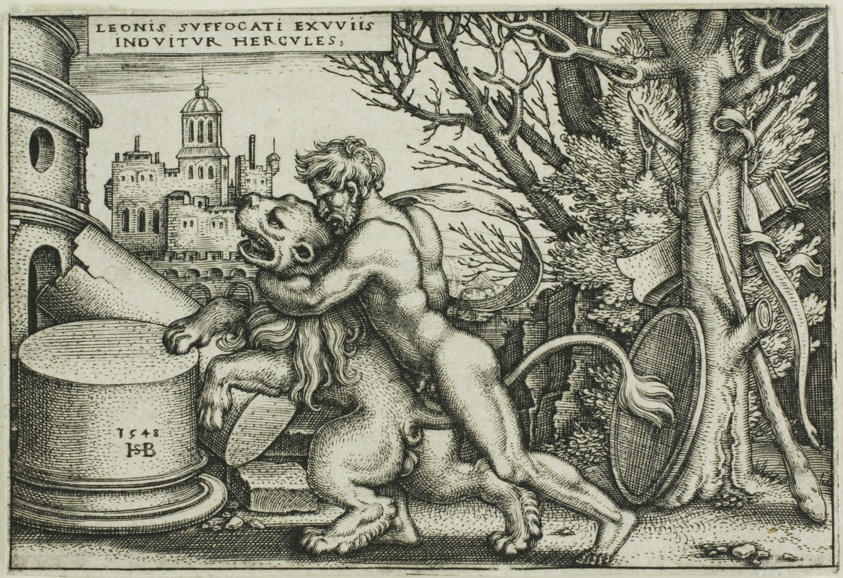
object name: Print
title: Hercules and the Nemean Lion, from The Labors of Hercules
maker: Sebald Beham; German, 1500-1550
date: 1548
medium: Engraving in black on ivory laid paper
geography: Germany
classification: engraving; print; prints and drawing